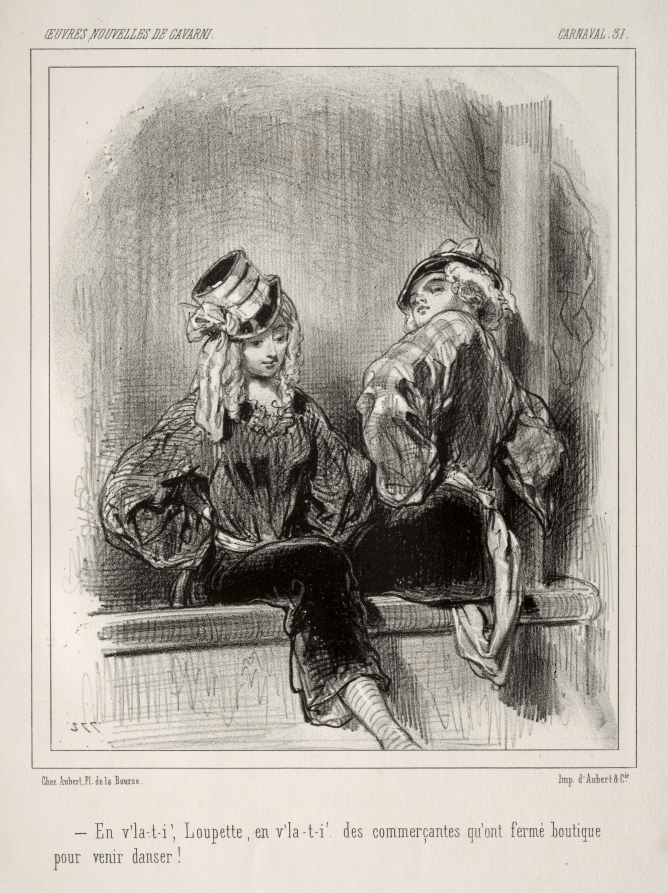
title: Carnaval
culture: France, 19th century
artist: Paul Gavarni (French, 1804–1866)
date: c. 1841–47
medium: lithograph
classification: Print